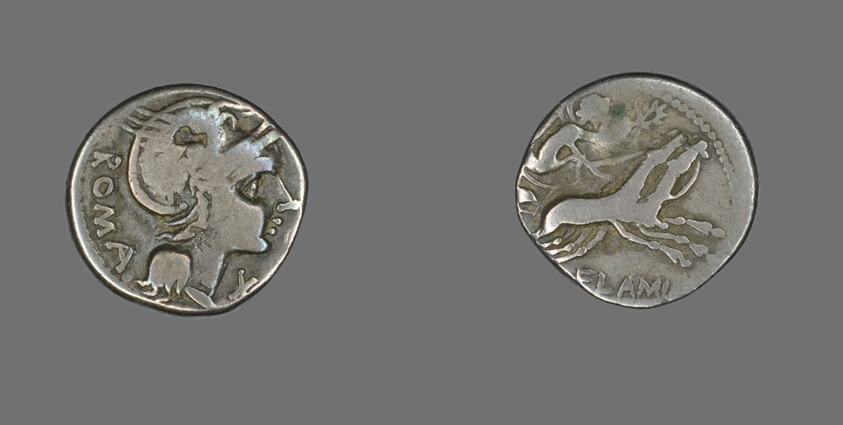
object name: Coin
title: Denarius (Coin) Depicting the Goddess Roma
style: roman (ancient, style or period), ancient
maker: Roman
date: 109-108 BCE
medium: Silver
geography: Roman Empire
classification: coin; ancient art